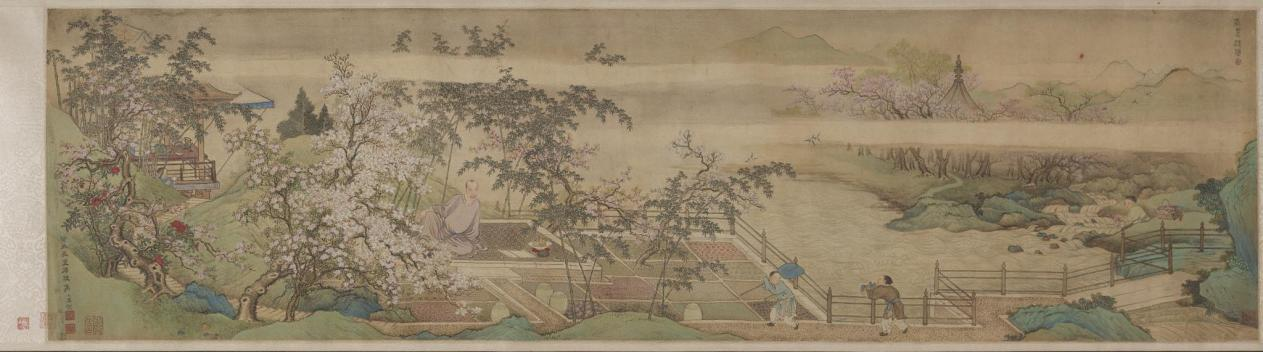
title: Cleansing Medicinal Herbs in the Stream on a Spring Day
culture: China, Qing dynasty (1644-1911)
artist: Yu Zhiding (Chinese, 1647–c. 1716)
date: 1703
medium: Handscroll; ink and color on silk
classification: Painting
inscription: Title by Chen Yixi.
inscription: 姑射仙人冰雪膚，新詩傳唱滿通都。/ 極知遲暮難為別，更展春泉洗藥圖。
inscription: Colophon by Chen Tingjing 陳廷敬 (1639–1712). Colophon by Wang Hongxu 王鴻緒 (1645–1723), dated 1707. Colophon by Song Luo 宋犖 (1634–1714). Colophon by Liu Yan 劉巗. Colophon by Jing Xikui 涇西夔. Colophon by Liu Yan 劉巗. Colophon by Cao Yin 曹寅. Colophon by Wang Shihong 汪士鋐. Colophon by Wang Shidan 王式丹 (1645–1718), dated 1712. Colophon by Shi Shenyi 史申義 (1661–1712), dated 1712. Colophon by Yin Yuqing 殷餘慶, dated 1712.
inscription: Colophon by Chen Shixia 陳時夏, dated 1729.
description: A famous portraitist, Yu Zhiding here depicts the likeness of Shi Shenyi 史申義 (1661–1712), an official and poet. Master Shi, a sickly man, was deeply interested in medicinal science. The opening section of the scroll features a boy washing a fungus in fresh spring water, a basket of medicinal herbs by his side. Other servants carry a fan, a bundle of scrolls, and a cup of tea or hot wine. Master Shi sits in a bamboo grove, surrounded by fields of herbs. Returning swallows, pink peach blossoms, and blooming magnolia indicate spring, whereas the fungus conveys wishes for long life. The spring theme may express the artist’s wish for his friend’s recovery.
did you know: In the pavilion are some of Shi Shenyi’s scholarly accoutrements: a stack of books, an antique zun 尊 (wine vessel), a brush holder, an ink stone, and a small chime.